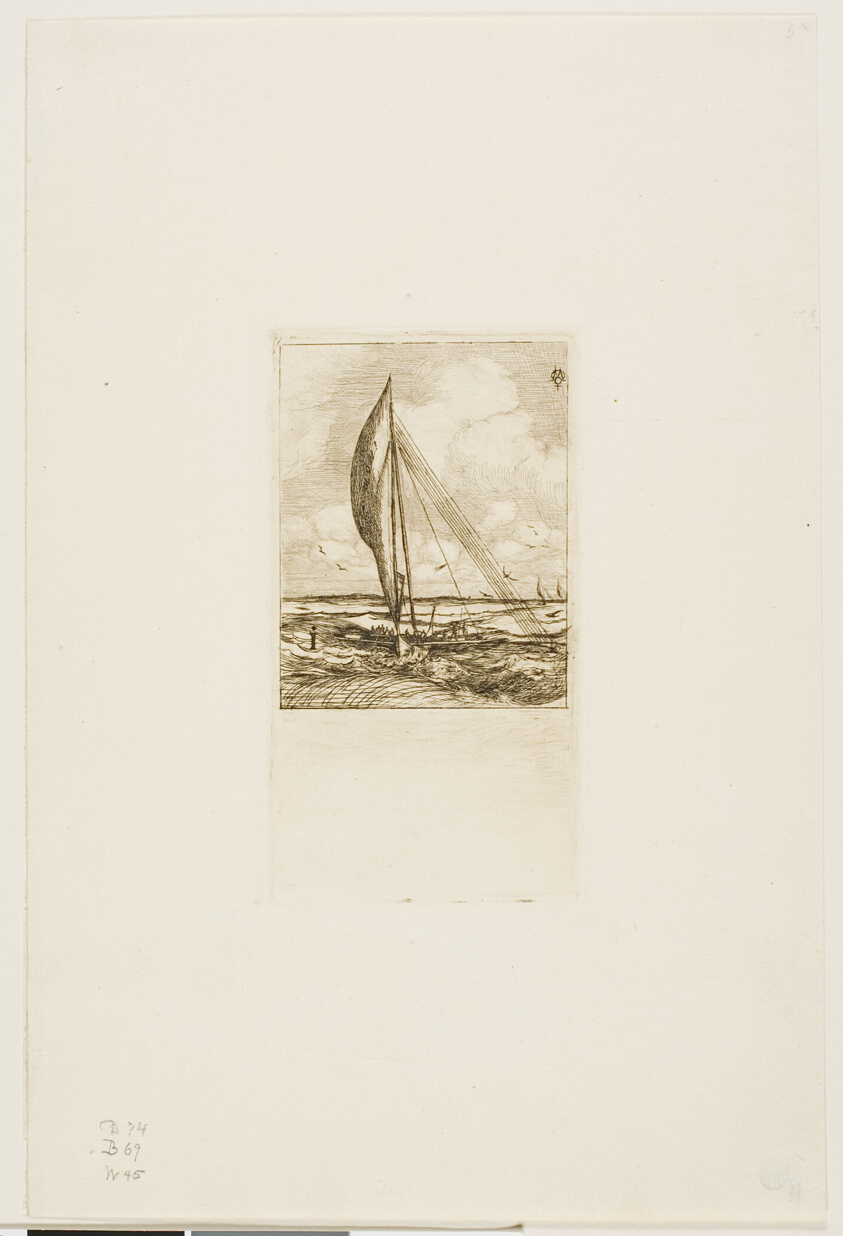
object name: Print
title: Swift-Sailing Proa, Mulgrave Archipelago, Oceania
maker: Charles Meryon (French, 1821-1868)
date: 1866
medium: Etching with drypoint, burnishing and scraping on ivory laid paper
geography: France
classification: etching; print; prints and drawing